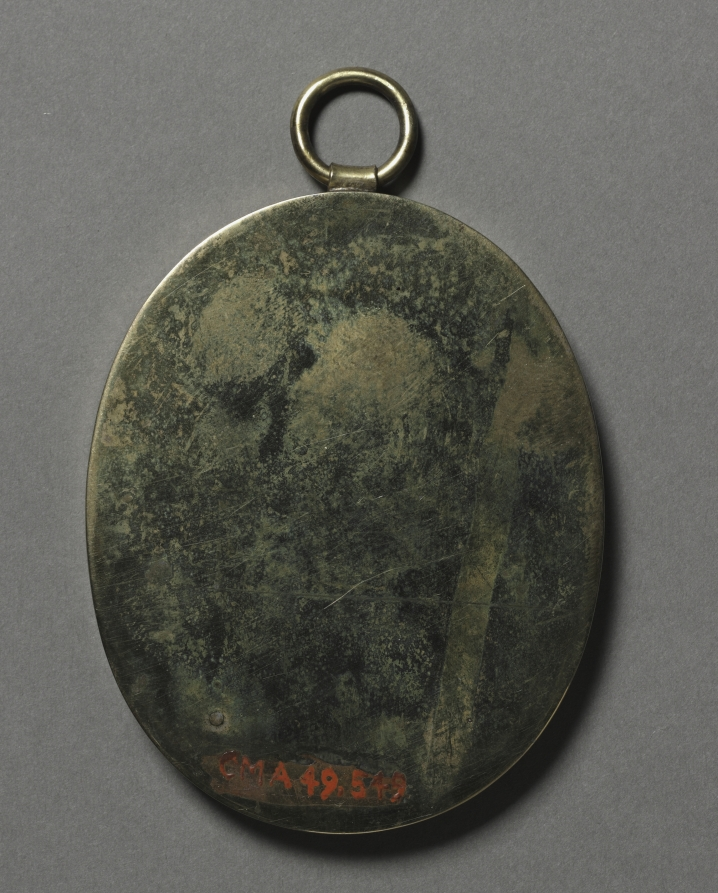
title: Portrait of John Churchill, 1st Duke of Marlborough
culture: England, 18th century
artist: Christian Friedrich Zincke (German, 1683/85–1767)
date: 1715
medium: enamel on copper in a gilt metal frame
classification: Portrait Miniature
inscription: signed on back: CF Zincke fecit/ 1715. [CF in monorgram].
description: Unlike fragile portrait miniatures painted in watercolor on vellum or ivory, which are prone to cracking, fading, and flaking, enamels are resilient, impervious to the effects of light, and retain their striking original colors over time. Partly for this reason enamel was considered ideal for reproducing famous paintings and treasured portraits in a reduced and luminous form. The complicated and labor-intensive process of enameling required the artist to fire numerous layers of colored metal oxide at different temperatures, which made it difficult to produce a faithful portrait likeness, though masters of the medium were able create portraits of remarkable subtlety imbued with the sitter's personality. The heyday of enamel painting was the late 1600s and early 1700s. Among the enamel specialists was Zincke, who worked in England where he was patronized by Queen Anne, King George I, and King George II.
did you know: Although miniatures are often regarded as a private art form exchanged between loved ones, the nature of this enamel was likely political.